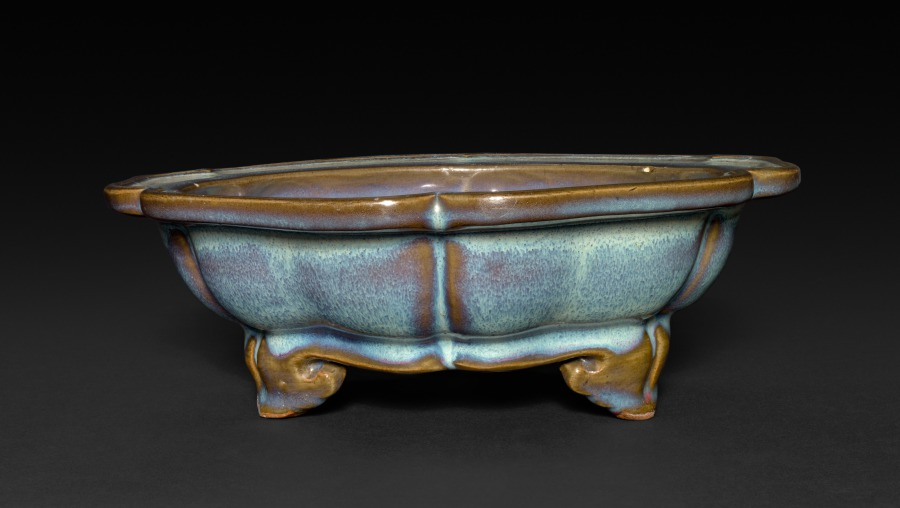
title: Flower Pot Stand or Bulb Bowl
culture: China, possibly Henan province, Yuan dynasty (1271-1368) - Ming dynasty (1368-1644)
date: 1300s–1400s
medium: glazed gray stoneware, Jun ware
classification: Ceramic